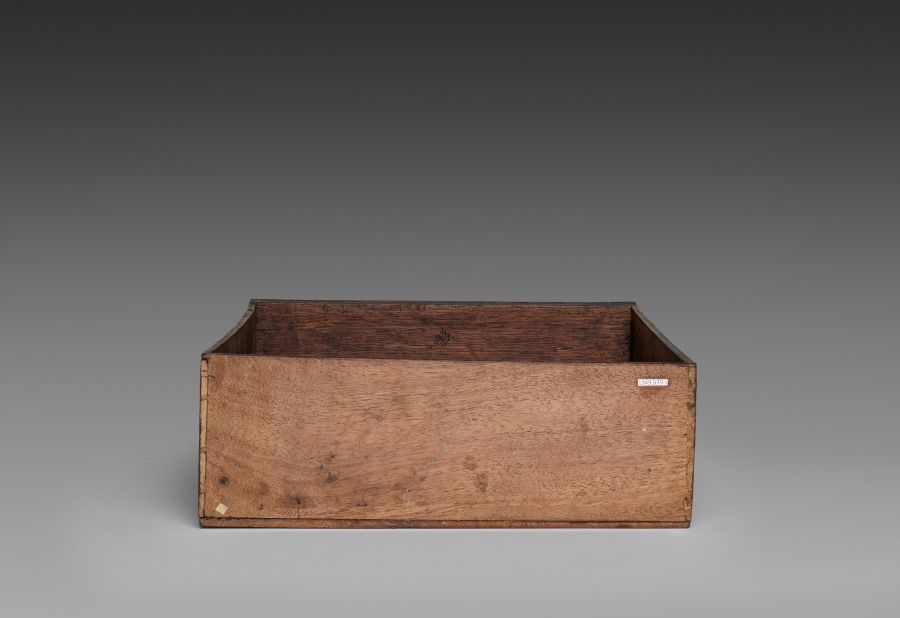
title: Interior Drawer for Cabinet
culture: France, late 17th Century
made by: André-Charles Boulle (French, 1642–1732)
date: c. 1690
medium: ebony, marquetry in metal and tortoiseshell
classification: Furniture and woodwork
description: Appointed cabinetmaker to King Louis XIV in 1672, André-Charles Boulle became a master of furniture making in France during the late 1600s until his death in 1732. Known primarily for his use of marquetry, in which metal patterns are inlaid into tortoiseshell then applied within the veneered surface of the furniture, Boulle established a level of quality and craftsmanship few others could achieve. As a result, his work found favor at the royal court and among other aristocrats and diplomats eager to impress the king. The inclusion of a medallion depicting Louis XIV within the bronze decoration of this chest would have identified the owner with the royal court. Often exhibiting stout architectural proportions with elegant groups of inlaid motifs such as the parrot on the central panel of this chest, Boulle’s designs are an example of the intellectual fashion for contrasting ideas, materials, and motifs.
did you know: Originally designed to sit atop an elaborate tall stand, this chest was likely altered in the late 1700s to reduce its scale and height.